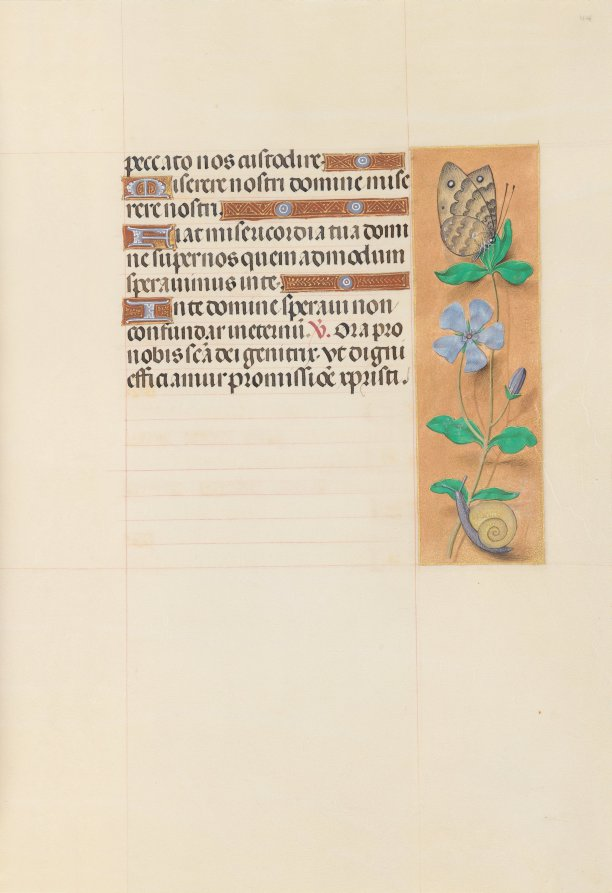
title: Hours of Queen Isabella the Catholic, Queen of Spain: Fol. 114r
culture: Flanders, Ghent and Bruges, late 15th century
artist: Master of the First Prayerbook of Maximillian (Flemish, c. 1444–1519)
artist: and Associates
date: c. 1500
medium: ink, tempera, and gold on vellum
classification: Bound Volume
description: This manuscript was illuminated by a circle of at least five highly organized manuscript painters active in the Flemish cities of Ghent and Bruges. The principal illuminator was Alexander Bening, who painted the majority of the book's miniatures. Manuscripts produced by this circle of artists are renowned for the decoration of their borders, which typically feature a rich variety of realistically-painted flowers, birds, and butterflies. This prayer book, called a book of hours, was intended not for a cleric, but for the private devotions of a lay person-in this case, Isabella the Catholic, Queen of Spain (1451-1504). Isabella's coat of arms embellishes the book's frontispiece. It is unlikely that the book was commissioned by the Queen herself; rather, she probably received it as a diplomatic gift from someone courting her patronage, perhaps Cardinal Francisco Jimenez de Cisneros. A Franciscan friar, Jimenez was dependent upon Isabella for his advancement, first to the post of Queen's confessor in 1492, and then to Archbishop of Toledo in 1495.